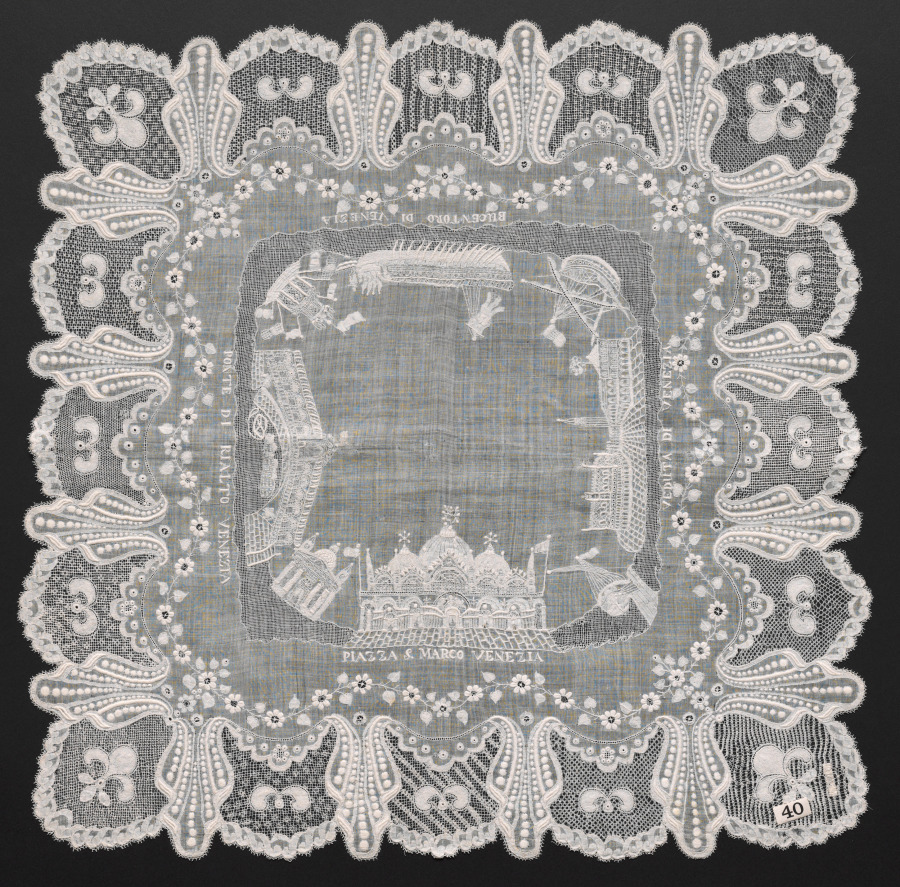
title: Handkerchief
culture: Italy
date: 1800s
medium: Plain weave linen with needle lace (drawnwork) and embroidery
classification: Embroidery